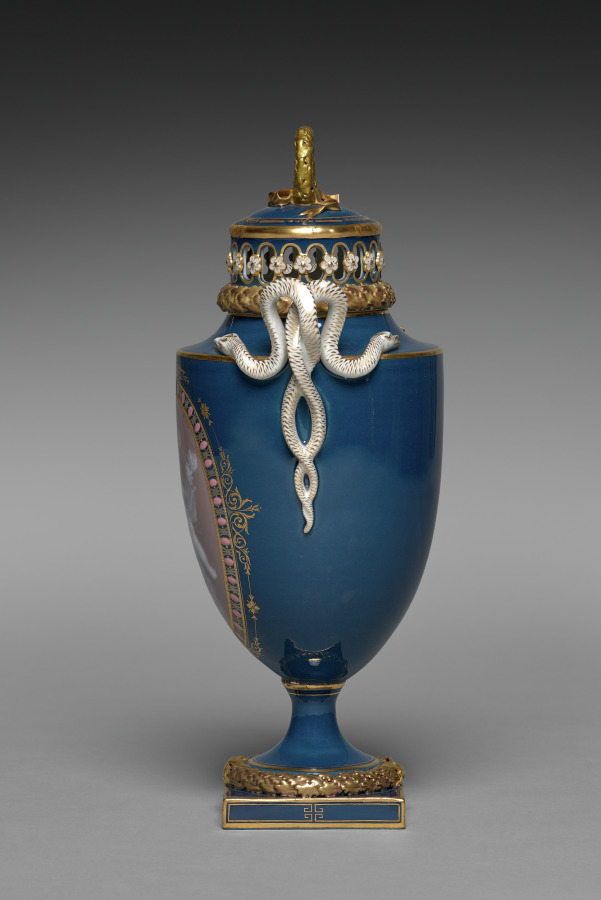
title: Covered Vase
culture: Germany, 19th century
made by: Meissen Porcelain Factory (German, est. c. 1710)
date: 1881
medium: porcelain with pâte-sur-pâte decoration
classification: Ceramic